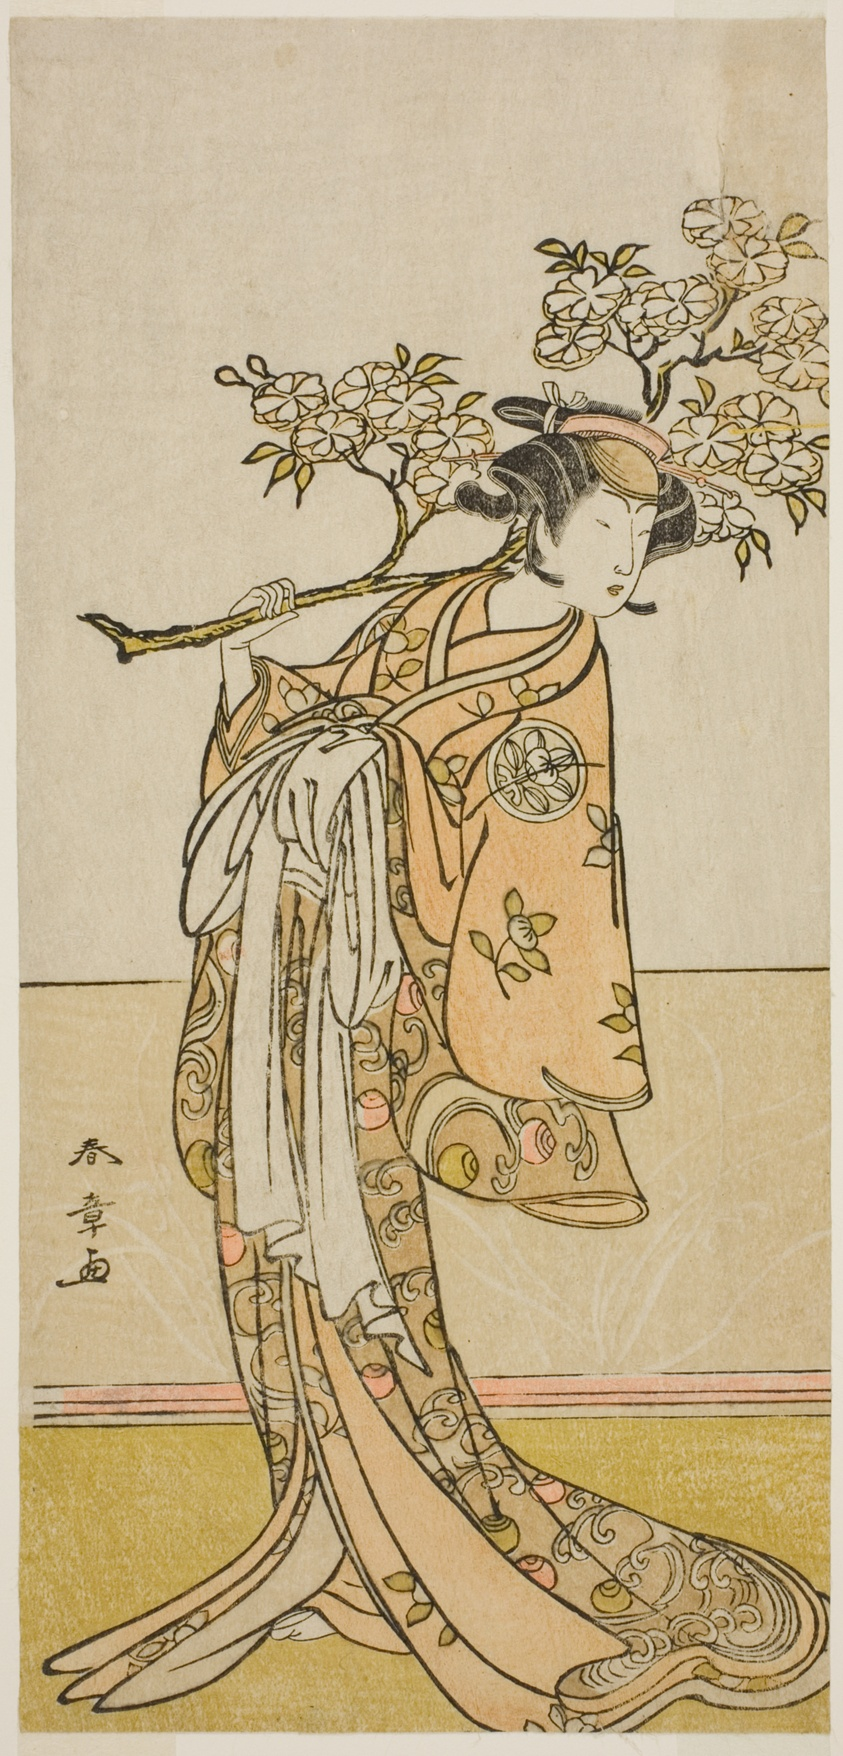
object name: Print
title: The Actor Ichimura Uzaemon IX in an Unidentified Role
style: Japanese (culture or style)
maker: Katsukawa Shunsho 勝川 春章; Japanese, 1726-1792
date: c. 1775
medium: Color woodblock print; hosoban; left sheet of diptych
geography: Japan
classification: woodblock print; print; asian art